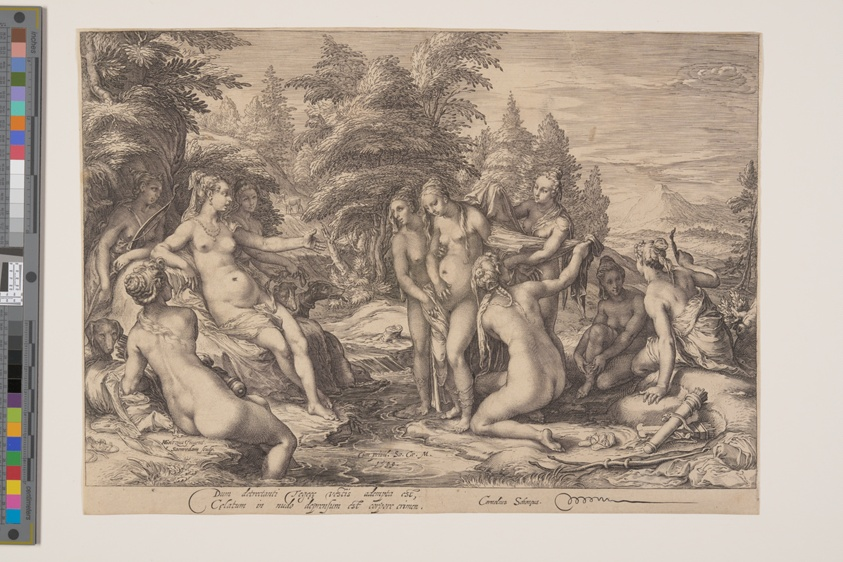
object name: Print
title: Diana and Callisto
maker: Jan Saenredam (Dutch, 1565–1607); after Hendrick Goltzius (Dutch, 1558-1617)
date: 1599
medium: Engraving on ivory laid paper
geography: Netherlands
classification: print; paper; prints and drawing; engraving